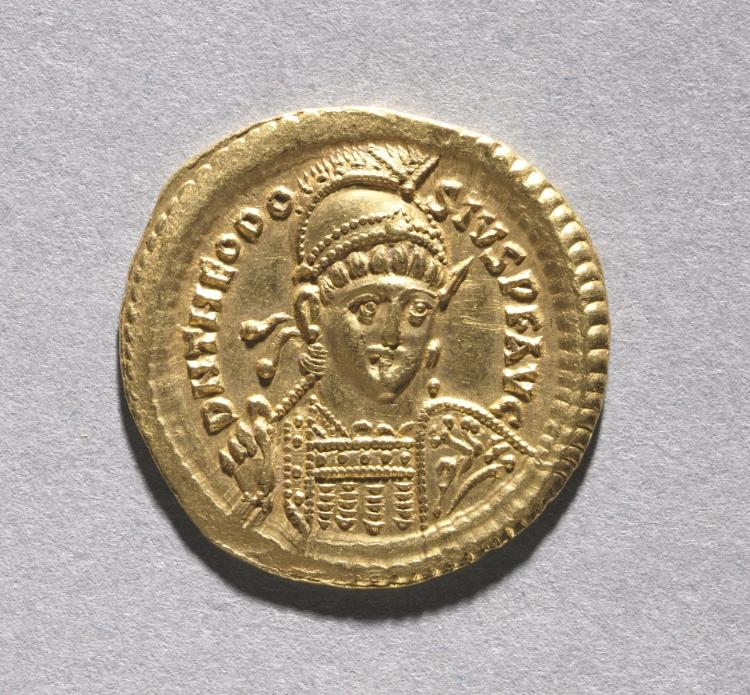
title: Solidus of Theodosius II and Valentinian III (obverse)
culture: Byzantium, Constantinople, Byzantine period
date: 408–425 CE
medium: gold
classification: Coins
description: Byzantine Gold Coins The vast number of surviving Byzantine coins attests to the level of trade across the empire. Controlled and supervised by the emperor, the producers of coins took care to represent his authority and reflect his stature. Talented artists were recruited to engrave the dies (molds) used for the striking of coins. Emperors increasingly came to include their heirs and co-emperors on their coinage, as well as other family members or even earlier rulers. Coins were recognized, then as now, as small, portable works of art. With their inscriptions and images, Byzantine coins provide valuable documentation of historical events and a record of the physical appearance of the emperors. The coins shown here include the solidus, the basic gold coin of 24 karats; the tremissis, a gold coin of one-third the weight and value of the solidus; and the nomisma, which in the 10th century replaced the solidus as the standard gold coin.